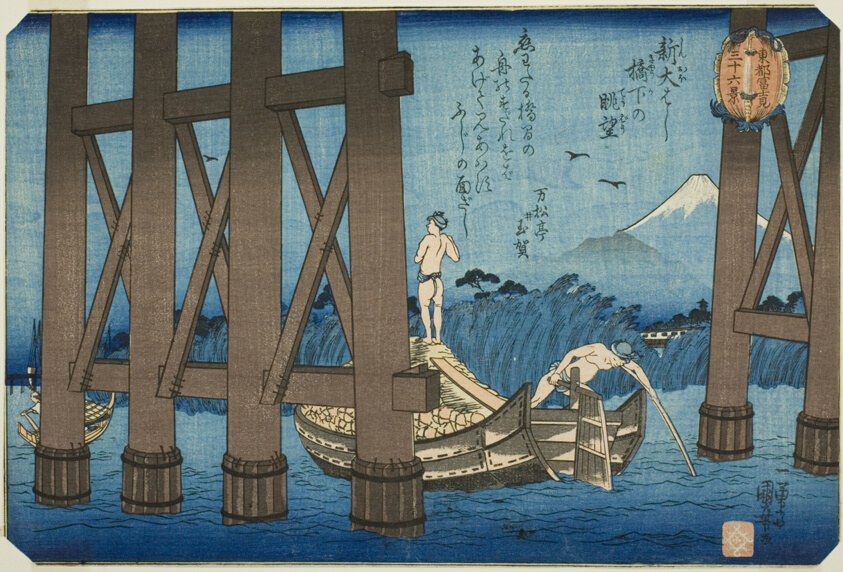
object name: Print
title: Distant View from beneath Shin Ohashi Bridge (Shin Ohashi kyoka no chobo), from the series "Thirty-six Views of Mount Fuji Seen from the Eastern Capital (Toto Fujimi sanjurokkei)"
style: Japanese (culture or style)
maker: Utagawa Kuniyoshi (Japanese, 1797-1861)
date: c. 1843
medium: Color woodblock print; oban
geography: Japan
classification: woodblock print; print; asian art